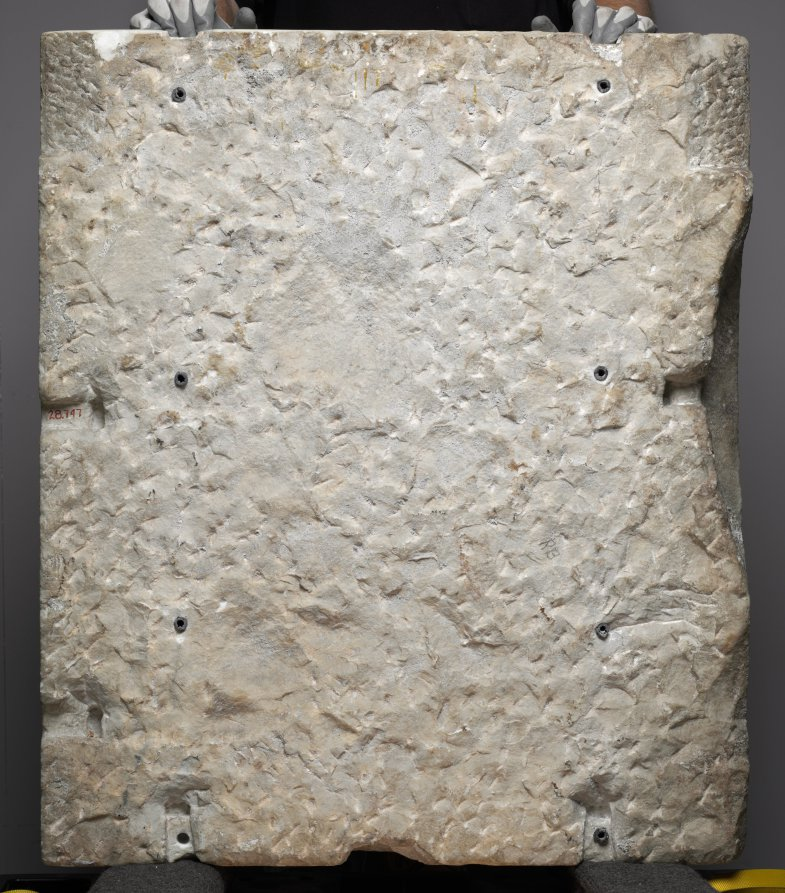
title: Madonna and Child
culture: Italy, Rome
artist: Mino da Fiesole (Italian, c. 1430–1484)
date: by 1461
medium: marble with traces of gilding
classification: Sculpture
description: This relief is one of four produced for the ciborium (canopy) erected by Cardinal Guillaume d'Estouteville over the high altar of the church of Santa Maria Maggiore in Rome. The ciborium was taken apart in 1747 and the other three panels--Christ Blessing, The Annunciation, and Saints Peter and Paul--were set into the walls of the sacristy.